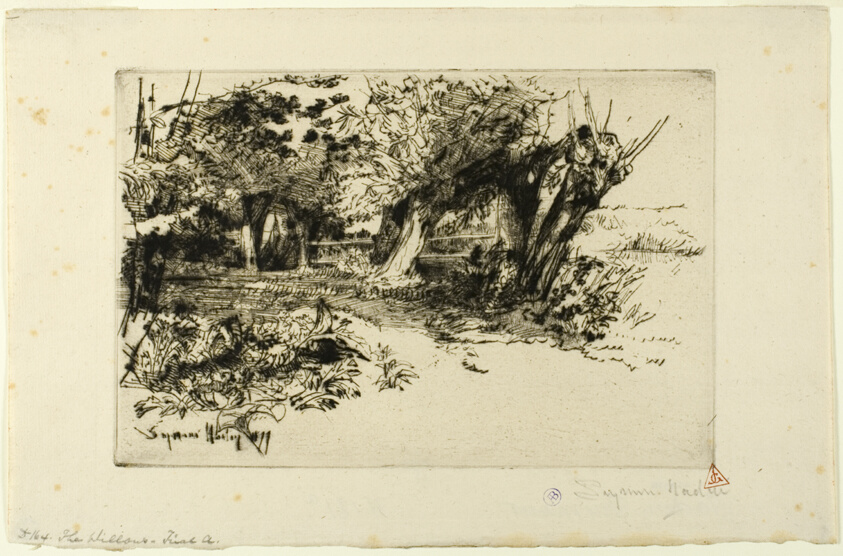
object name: Print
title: The Willows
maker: Francis Seymour Haden (English, 1818-1910)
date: c. 1877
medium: Drypoint on ivory laid paper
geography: England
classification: drypoint; print; prints and drawing